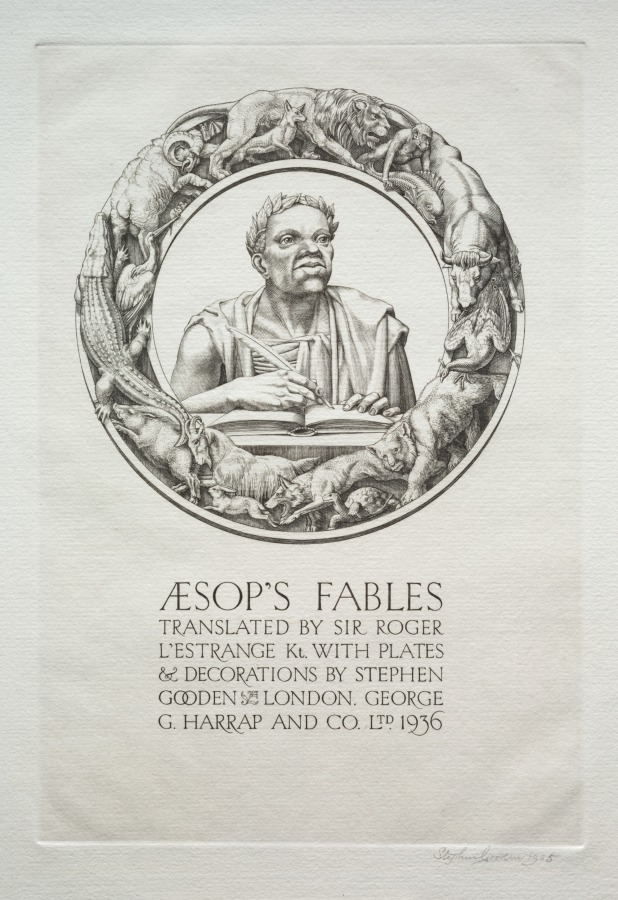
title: Aesop's Fables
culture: England, 20th century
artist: Stephen Gooden (British, 1892–1955)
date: 1936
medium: engraving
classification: Portfolio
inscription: signed in pencil, lower right margin: Stephen Gooden 1935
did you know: Stephen Gooden was also a well-known bookplate designer; one of his designs was for the royal library at Windsor Castle.